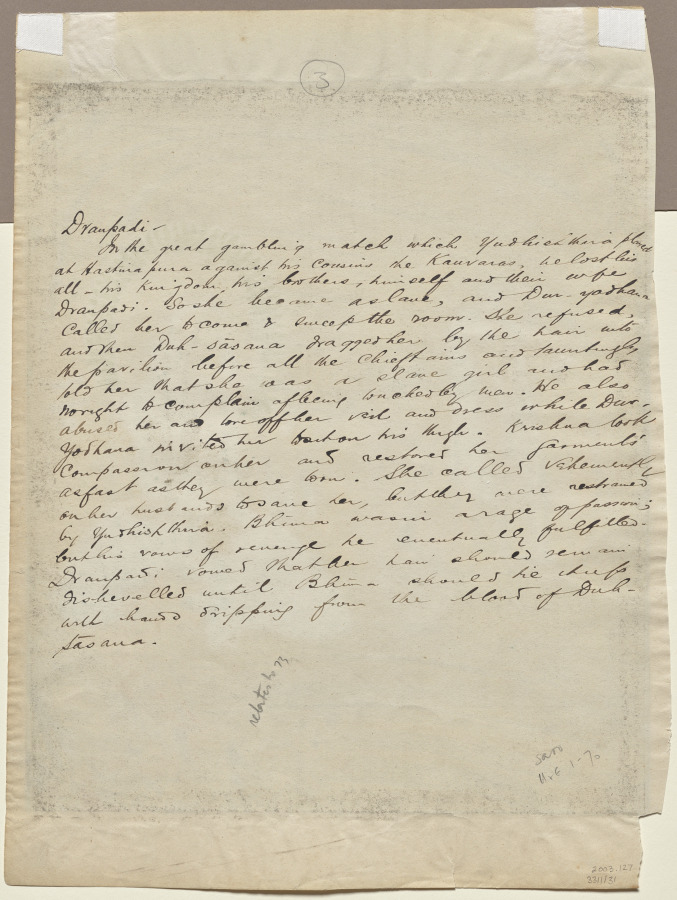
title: The Goddess Ganga, from a Kalighat album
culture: Eastern India, Bengal, Kolkata, Kalighat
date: c. 1890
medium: Gum tempera, graphite, and ink on paper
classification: Painting